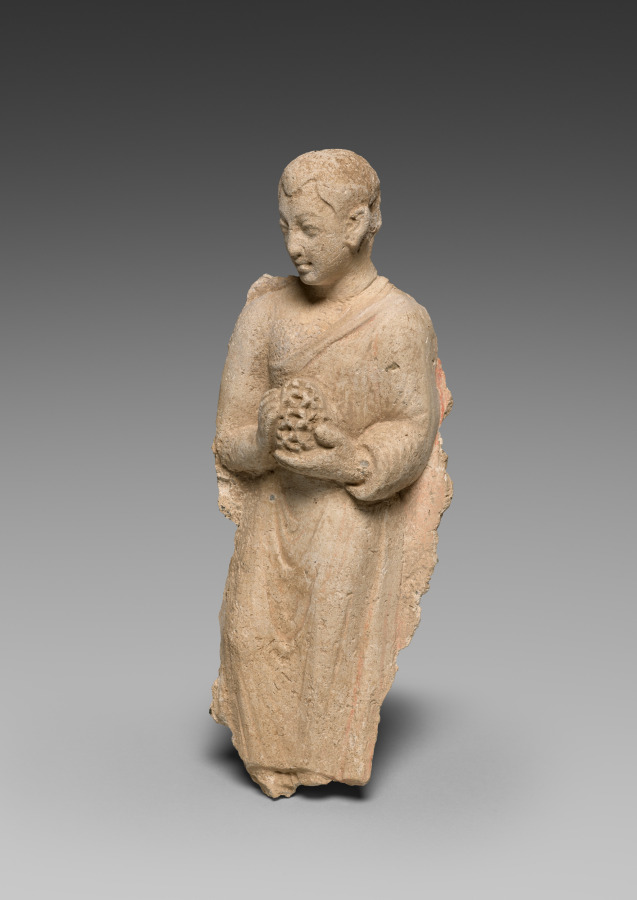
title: Monk bearing offerings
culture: Afghanistan, Hadda, probably Tape Shotor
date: c. 300 CE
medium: stucco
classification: Sculpture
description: This Buddhist monk wears a robe over one shoulder, and his hair has been shaved. He reverently brings offerings of fruit or flowers to the Buddha. Triads depicting the Buddha with attendants bringing offerings were set up on the base of monuments called stupas, in niches defined by pilasters with Corinthian-style columns indicative of the region's Hellenistic heritage.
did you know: This sculpture came from a monastery famous for preserving pieces of the Buddha's skull and robe.